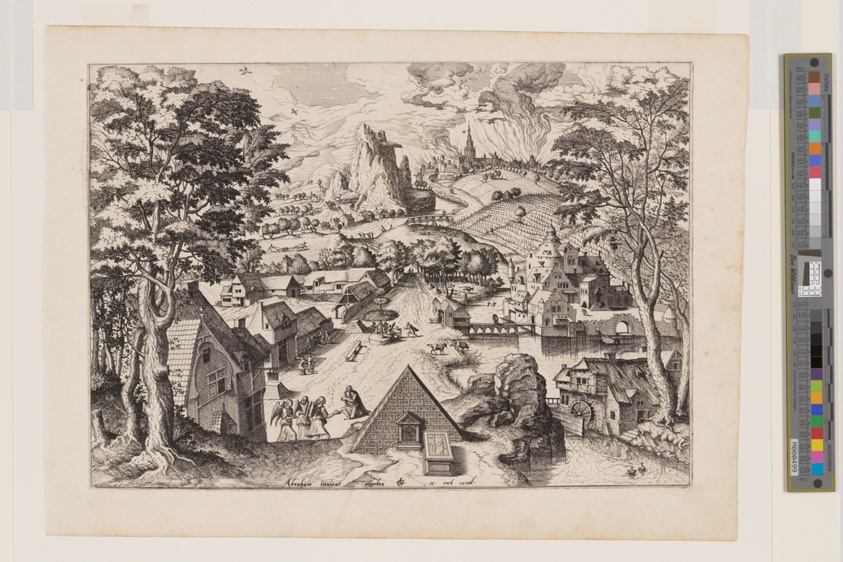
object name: Print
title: Abraham Entertaining Angels, from Landscapes with Biblical Subjects and Saints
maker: Johannes van Doetecum (Netherlandish, 1528/32–1605) and Lucas van Doetecum (Dutch, died before 1584); after Lucas Gassel (Netherlandish, c. 1485-c. 1568)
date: c. 1562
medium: Etching on ivory laid paper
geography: Netherlands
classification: etching; paper; print; prints and drawing